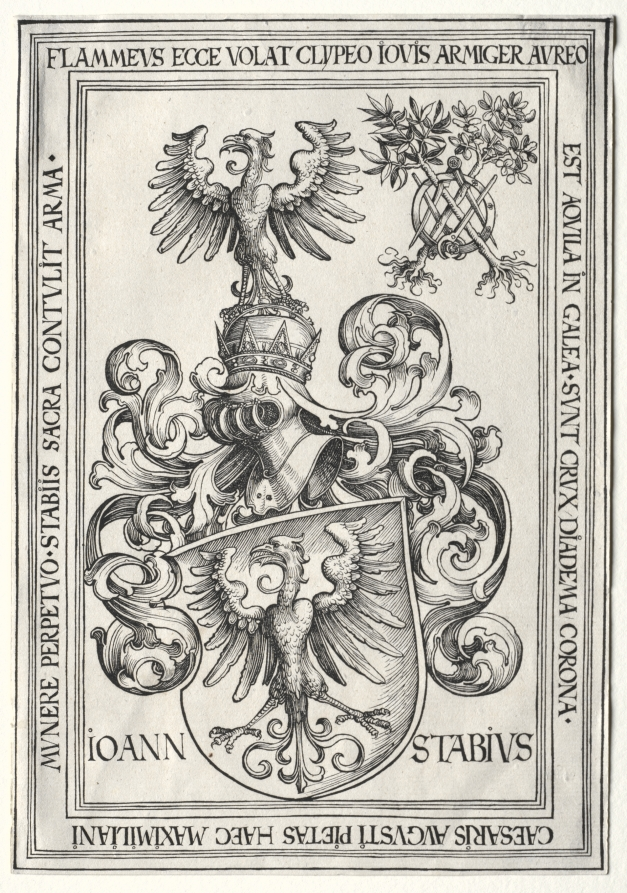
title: Coat of Arms of Johann Stabius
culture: Germany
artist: Wolf Traut (German, c. 1486–1520)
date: after 1500 (printed later)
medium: woodcut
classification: Print